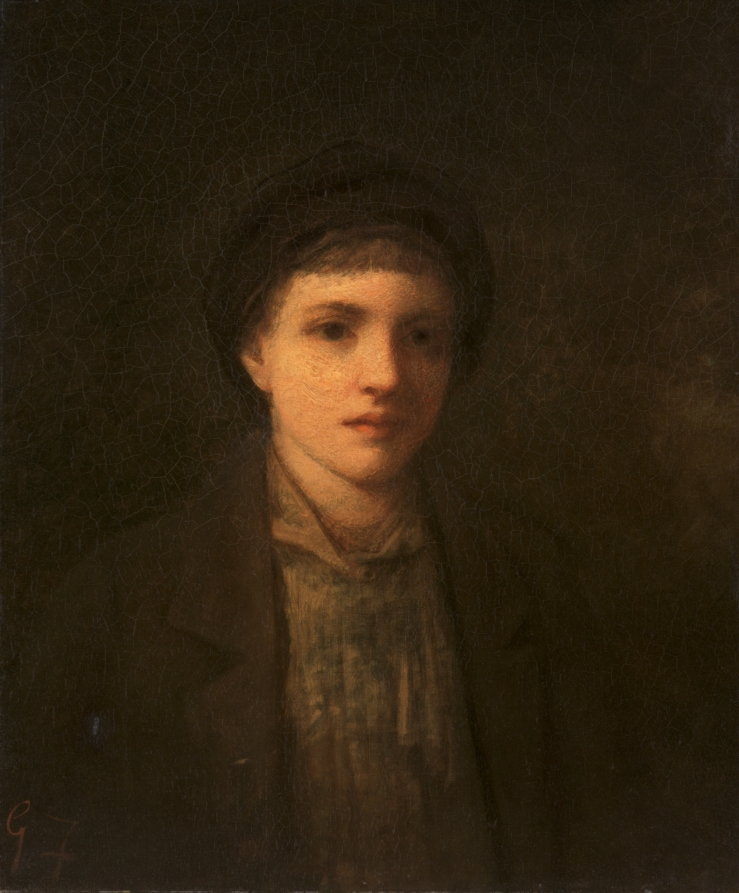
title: Head of a Boy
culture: America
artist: George Fuller (American, 1822–1884)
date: before 1885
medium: oil on canvas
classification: Painting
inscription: signed lower left: G F